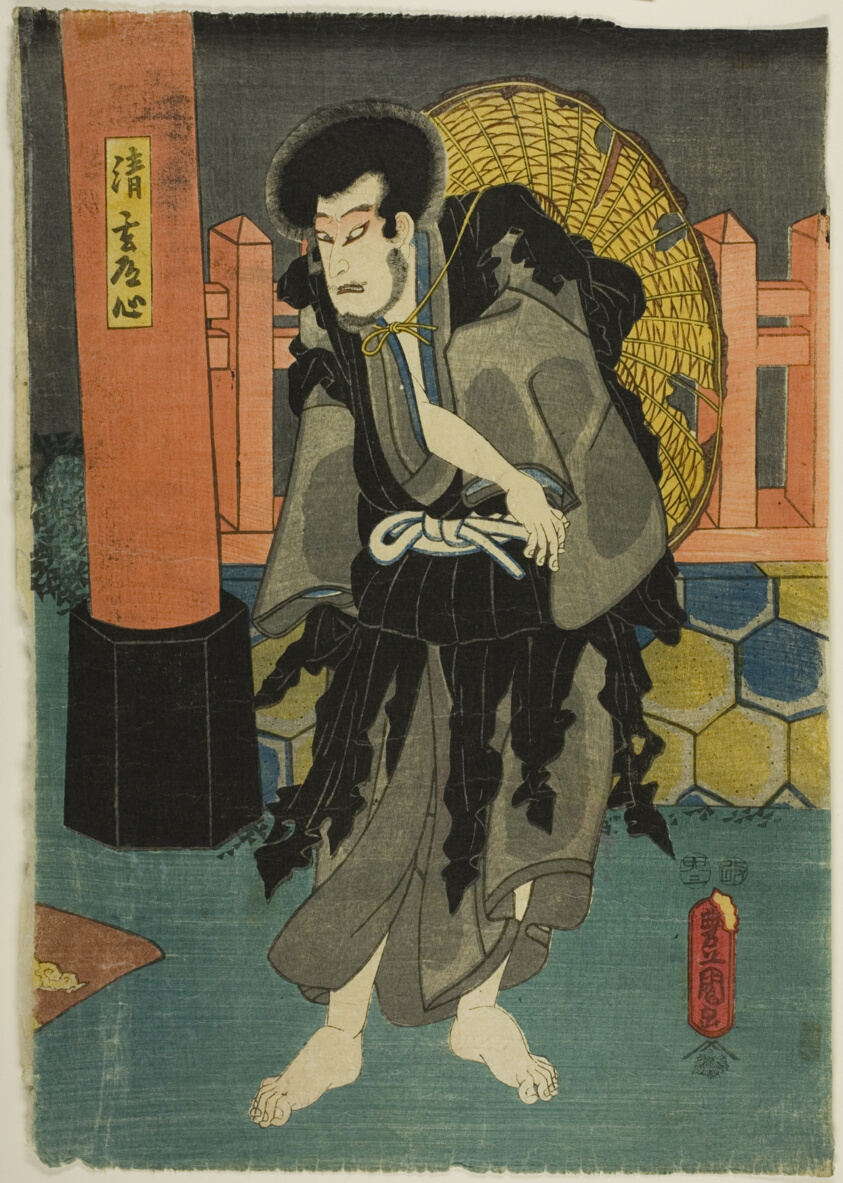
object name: Print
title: Actor Playing Seigen Doshin in the play Hana butai banjaku soga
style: Japanese (culture or style)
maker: Utagawa Toyokuni I 初代 歌川 豊国; Japanese, 1769–1825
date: 1802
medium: Color woodblock print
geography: Japan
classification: woodblock print; print